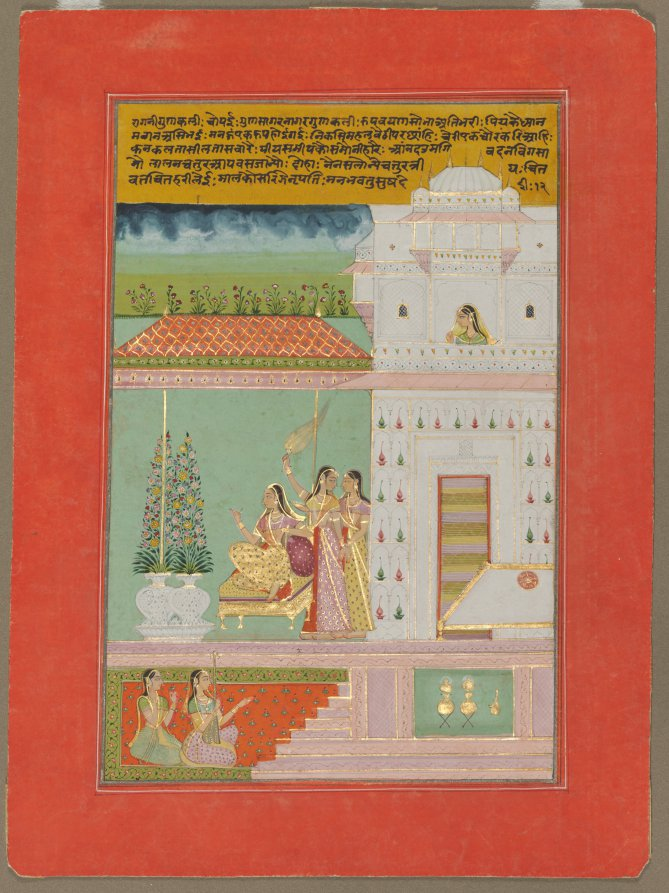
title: Gunakali Ragini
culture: Northwestern India, Rajasthan, Jaipur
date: c. 1750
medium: Gum tempera and gold on paper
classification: Painting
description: A princess sits on a throne under a canopy. Her companion holds the royal fly whisk above her head. According to the verse at the top, she absentmindedly plucks flowers as she daydreams about lovemaking. Below, a woman holds an instrument, possibly referring to the musical compositions that were played for the viewers in accordance with the scene and mood of the verse. The two women kneel on a carpet, which the artist has tilted up to a vertical plane, so its pattern of stylized water lilies on a bold orange ground surrounded by a green border with undulating flowering vines can be fully seen.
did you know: Sets of paintings by royal court artists, such as the Ragamala series from which this page came, were made for sale, rather than for the private collection of the king.